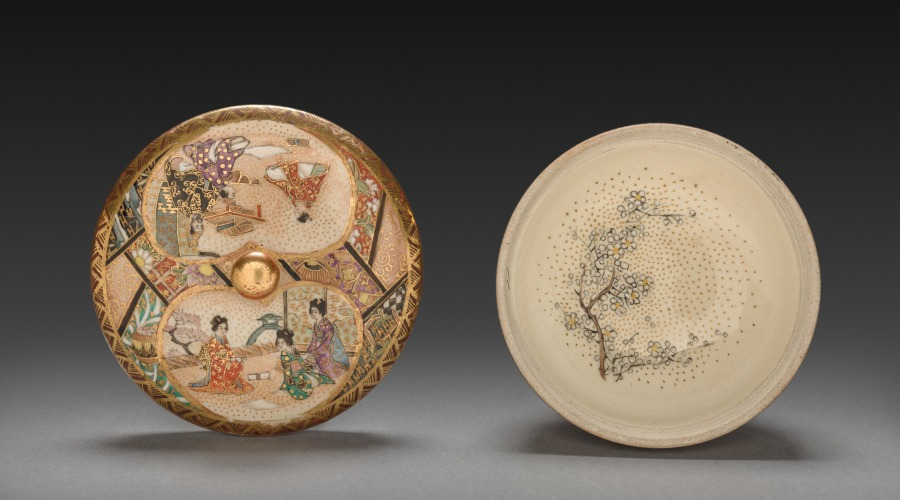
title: Covered Dish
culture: Japan, Meiji period (1868–1912)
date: early 1900s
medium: porcelain with overglaze color enamel and gold (Satsuma ware)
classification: Ceramic